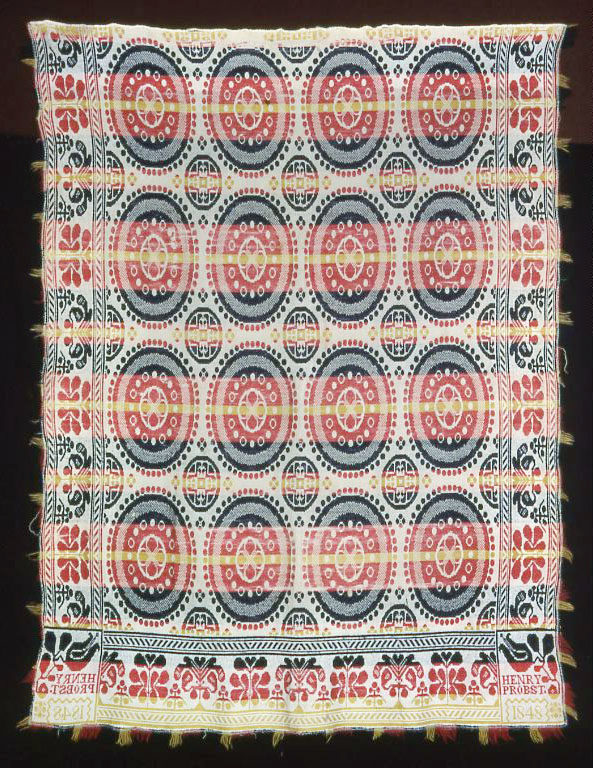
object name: Textile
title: Coverlet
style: 19th century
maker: United States, Pennsylvania, Lehigh County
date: 1848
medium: Cotton and wool, plain weave with plain interlacings of secondary binding warps and patterning wefts (Beiderwand); woven on loom with Jacquard attachment; full loom width; seamless; fringed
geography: Pennsylvania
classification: weaving - coverlet; coverlet; weaving; textile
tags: medallions, circles, flowers, coverlet